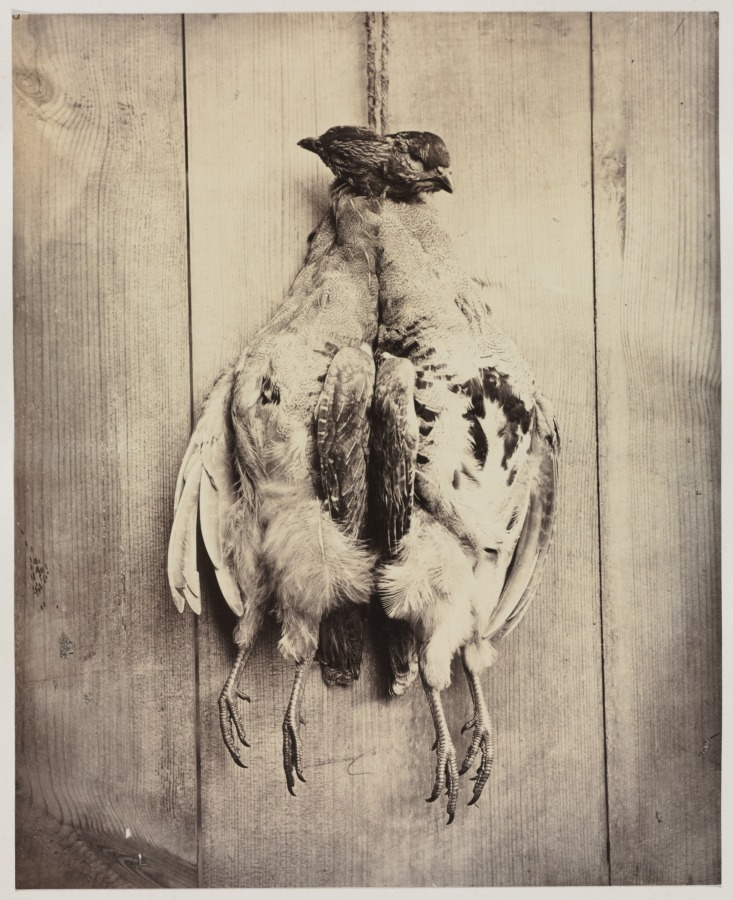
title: Partridges (recto); L.D. Campbell's Tomb (verso)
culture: England, 19th century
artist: Captain N. Baily (British)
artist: John Hamilton Craigie (British)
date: c. 1861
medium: albumen print from wet collodion negative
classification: Photograph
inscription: Written in ink on pasted paper on recto: "Partridges/W. Baily, Esq." (writing on back of pasted label)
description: N. Baily carefully arranged a simple composition of two partridges hanging by a thin rope against a plain wood wall. Like many photographers in the 1850s and 60s, he was interested in displaying the camera’s ability to record in detail the variety of shapes and textures present in the still life. Little is known of Baily, a British amateur photographer. He was a member of the Amateur Photographic Association and participated in several of their album exchanges. Still lifes incorporating game, fowl, and fish were popular among amateur photographers during this period. Many members of the Amateur Photographic Association were gentlemen that formerly belonged to the British armed forces and would have participated in hunting as a pastime.